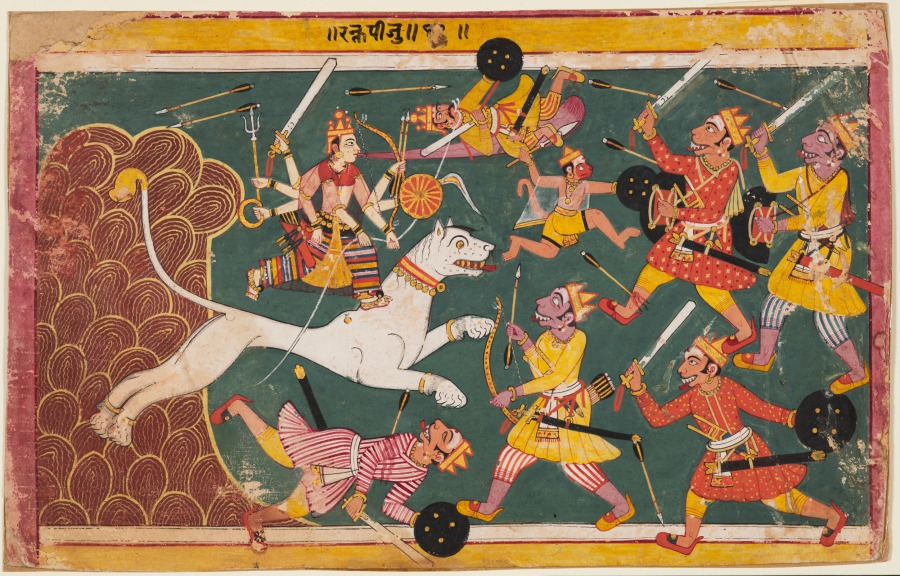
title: The Goddess Annihilates the Demon Raktabija, from a Devi-Mahatmya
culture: Central India, Madhya Pradesh, Malwa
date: c. 1640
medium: gum tempera, ink, and gold on paper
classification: Painting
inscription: raktapīju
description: The demon Raktabija had received a boon that from each drop of his blood that falls on the ground, a new demon would arise. When the Goddess wounded Raktabija in combat, and drops of his blood fell on the ground and generated new Raktabijas, she extended her tongue to catch every drop before it hit the ground. Here she is shown lapping up Raktabija himself.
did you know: The painting also depicts Hanuman, the monkey god, fighting for the Goddess.